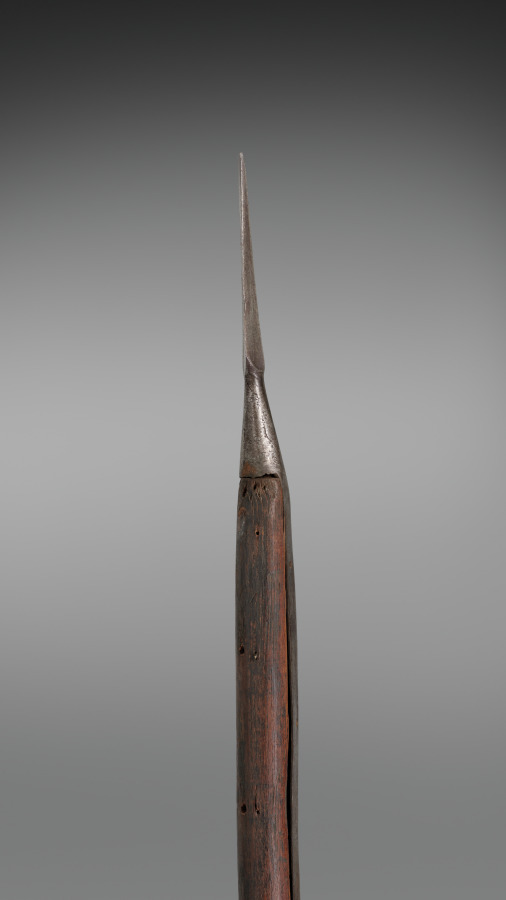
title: Banner With the Lion of St. Mark (pole)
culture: Italy, Venice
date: late 1600s - early 1700s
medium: wood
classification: Arms and Armor